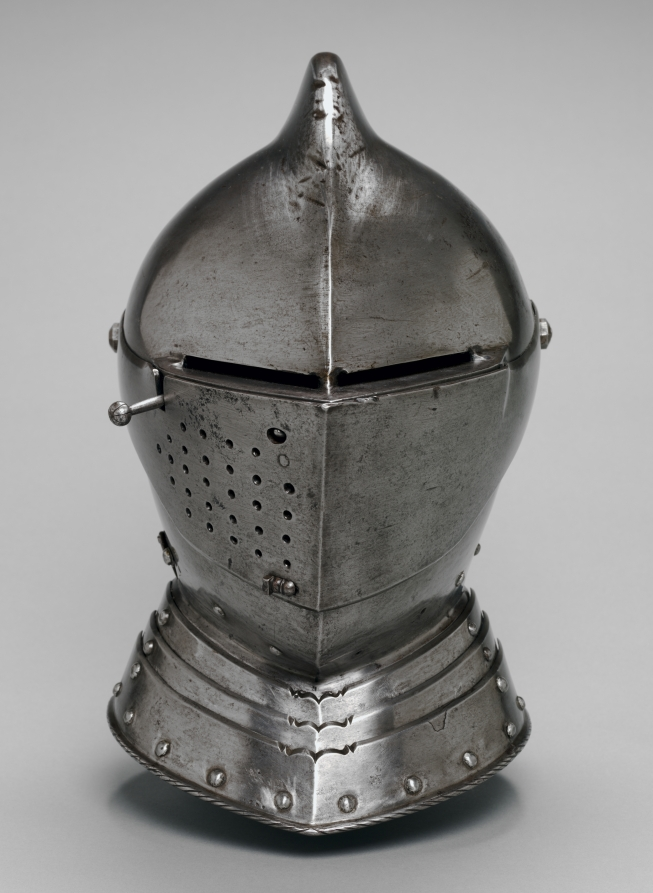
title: Helmet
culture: Germany, Saxony, 16th century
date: c. 1560–80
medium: steel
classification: Arms and Armor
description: This helmet was developed for the joust, a sporting combat of arms between two mounted contestants. This example shows the asymmetry of jousting armor. The participants rode along a wall-like barrier known as a "tilt" with their left sides facing. Consequently, armor on that side of the body tended to be thicker. The breath holes in the helmet were placed on the right side (farthest from an opponent's lance) to avoid injuries from splinters. The popularity of jousts and tournaments peaked around 1500 and required armor and other sporting equipment adapted for the endlessly varied games. By the reign of Emperor Maximilian I (1493–1519), there were at least 11 different forms of mounted jousts, exclusive of the numerous ceremonial combats on foot using such weapons as swords, halberds, pikes, and throwing axes. Each blow in the contest, especially favored in Germany, was carefully numbered and prescribed by rules.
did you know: Jousting contestants wore armor and charged at each other full speed on horseback, attempting to dismount the other with a lance. Such equipment protected contestants from injury, much like the helmet worn by football players today.